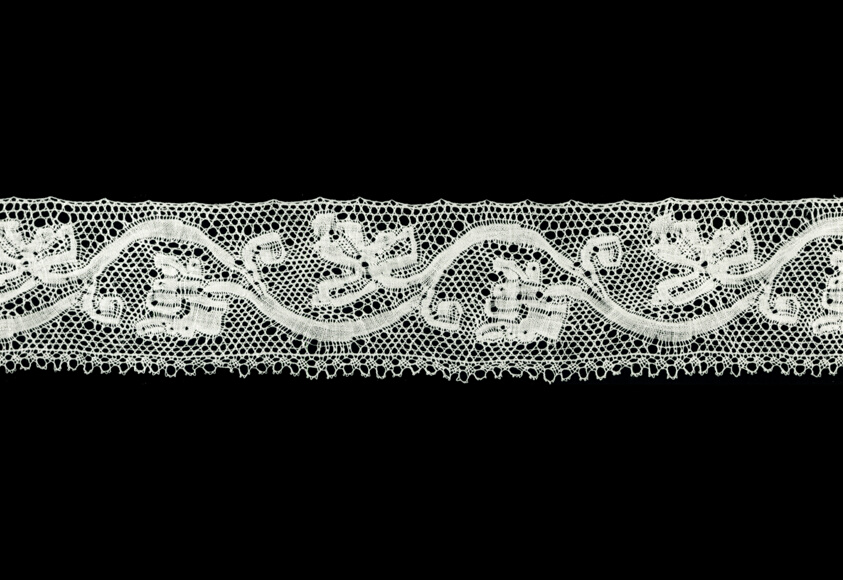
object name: Textile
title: Border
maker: Italy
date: Second half of 18th/early 19th century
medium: Linen, bobbin straight lace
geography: Italy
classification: textile; lace - bobbin